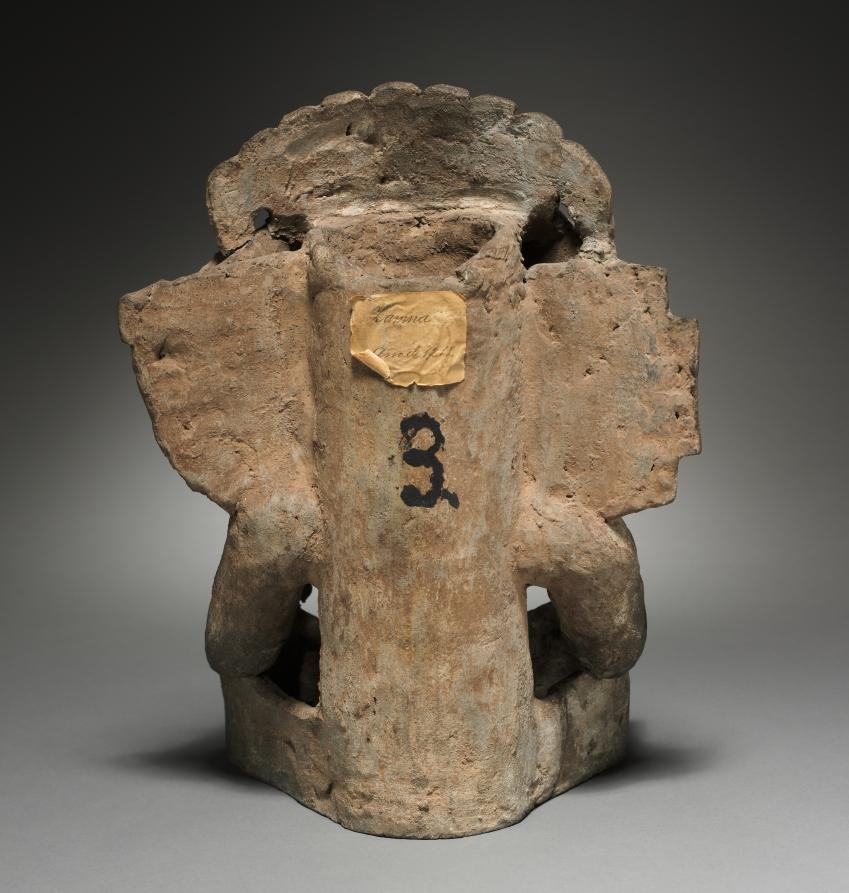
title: Funerary Urn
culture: Mexico, Oaxaca, 5th-6th Century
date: 400s-500s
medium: earthenware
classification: Sculpture